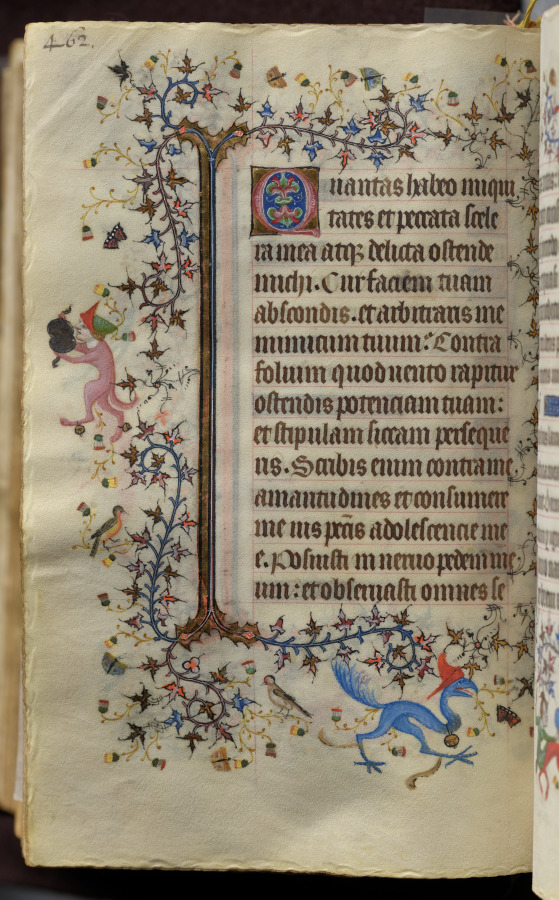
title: Hours of Charles the Noble, King of Navarre (1361-1425): fol. 225v, Text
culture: France, Paris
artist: Master of the Brussels Initials and Associates (French)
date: c. 1405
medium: ink, tempera, and gold on vellum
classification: Bound Volume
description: This precious volume was obviously highly prized by its owner, the French-born King of Navarre, who had his coat of arms painted on no less than twenty folios. Rather than directly commissioning this manuscript from a specific workshop, it seems that Charles the Noble acquired his book of hours -- perhaps ready-made for the luxury market -- while on a trip to Paris in 1404-05. A collaborative effort, six painting styles are evidenced within the pages of this codex, those of two Italians, two Frenchmen, and two Netherlanders. The painter who was responsible for the planning and decoration of the book, and who produced seventeen of the large miniatures, was a Bolognese artist known as the Master of the Brussels Initials. His principal assistant, responsible for most of the borders, was a Florentine who signed his name "Zecho" da Firenze on folio 208 verso.